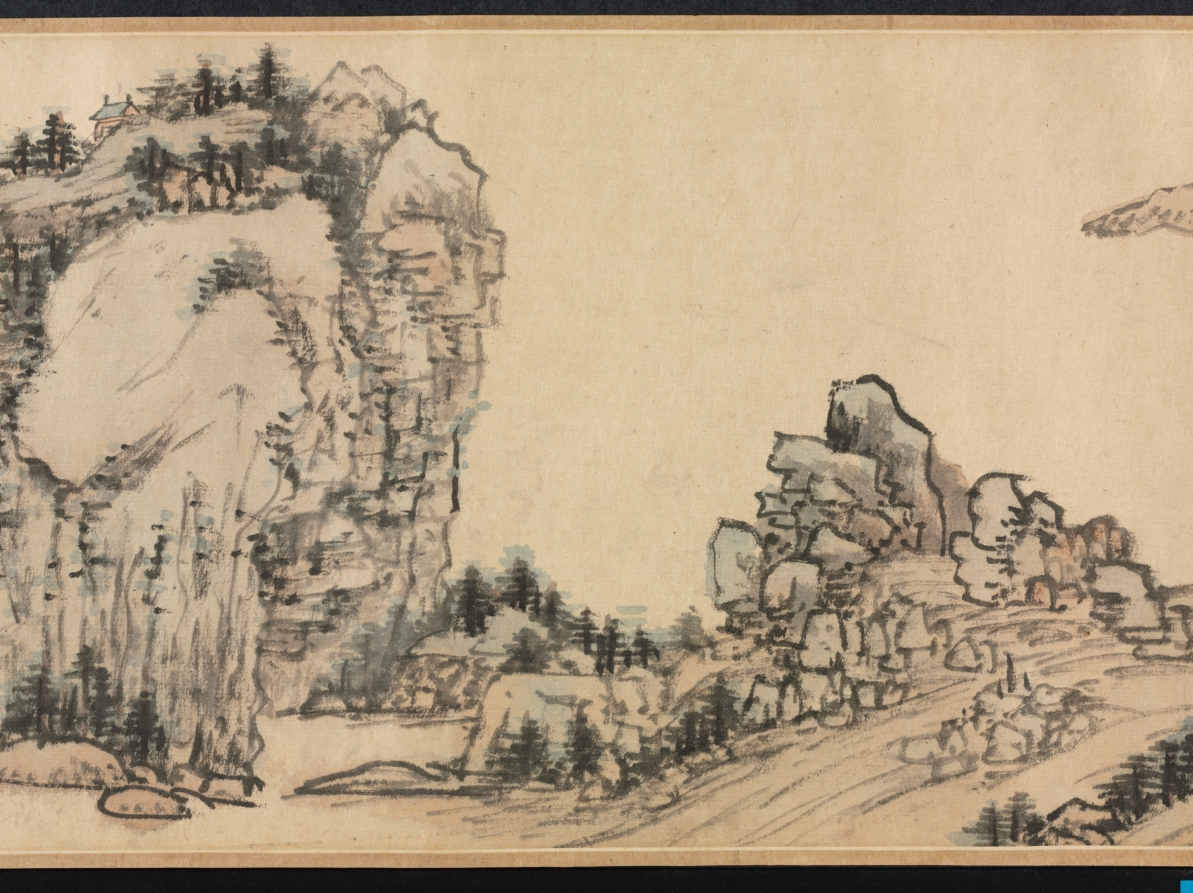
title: Dream Journey among Rivers and Mountains, no. 90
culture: China, Qing dynasty (1644-1911)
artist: Cheng Zhengkui (Chinese, 1604–1676)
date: 1658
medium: Handscroll; ink and color on paper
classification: Painting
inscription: 江山臥遊圖其九十, 青溪道人, 戊戌夏五。 [印] 程正揆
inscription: Title and inscription by Huang Yi 黃易 (1744–1802), and 3 seals.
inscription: 1 colophon and 9 additional seals: 3 seals of Dai Zhi 戴植 (active about 1821–1850); 1 colophon, dated 1914, and 3 seals of Yan Shiqing 顏世清 (1873–1929); 3 seals of Wang Nanping 王南屏 (1924–1985).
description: Cliffs and waterfalls interspersed with trees and dotted vegetation are spread over this handscroll. Long paths wind their way through villages, beside cottages, shrines, and over bridges. In the past, Chinese literati officials liked to take a “dream journey” along mountains and rivers when viewing landscape paintings in their studios. Scenery of this kind thus became a way to escape from the world of bureaucracy and administration. The painter Cheng Zhengkui used the title “Dream Journey” for a whole series of paintings, of which this is number 90. He is said to have painted 500 of them, but the actual count remains unknown.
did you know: Cheng Zhengkui planned to make 100 dream journey paintings but may have ultimately made 500.